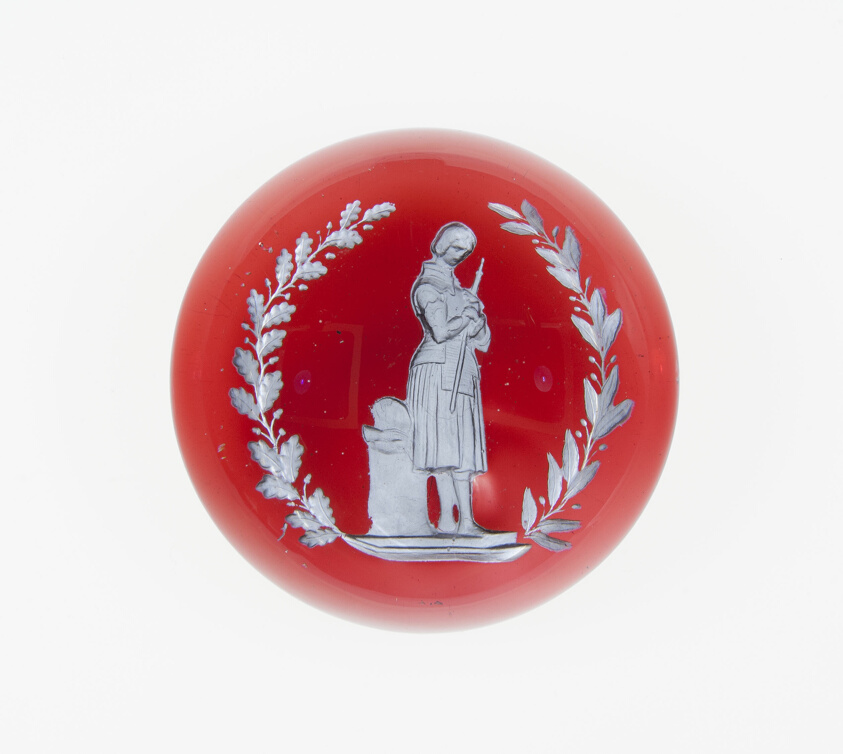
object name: Glass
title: Paperweight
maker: Baccarat Glassworks (Cristalleries de Baccarat); Lorraine, France, founded 1764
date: Mid 19th century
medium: Glass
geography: Baccarat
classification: paperweight; glass